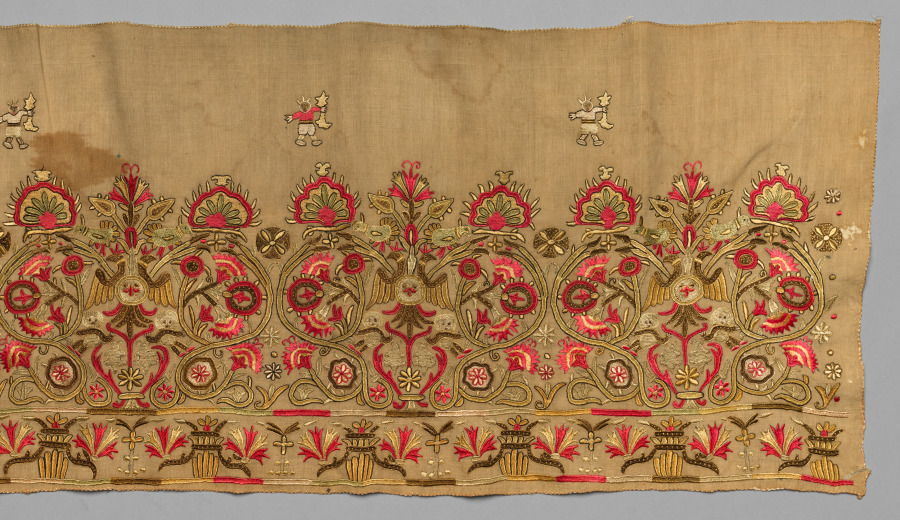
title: Complete Skirt Border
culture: Greece, Crete, 18th century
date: 1700s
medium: embroidery: silk on linen tabby ground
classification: Embroidery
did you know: Above the repeating floral motifs stand six small, evenly spaced figures wearing crowns and carrying maces.